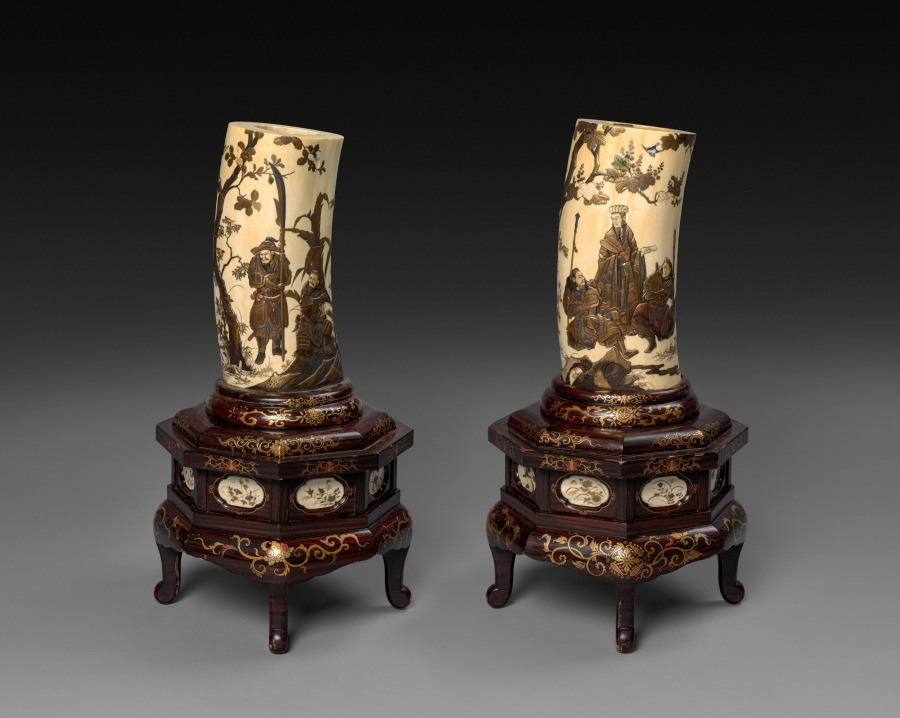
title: Ivory Tusk Vases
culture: Japan, Meiji period (1868–1912)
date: late 1800s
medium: carved ivory, pigment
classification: Ivory